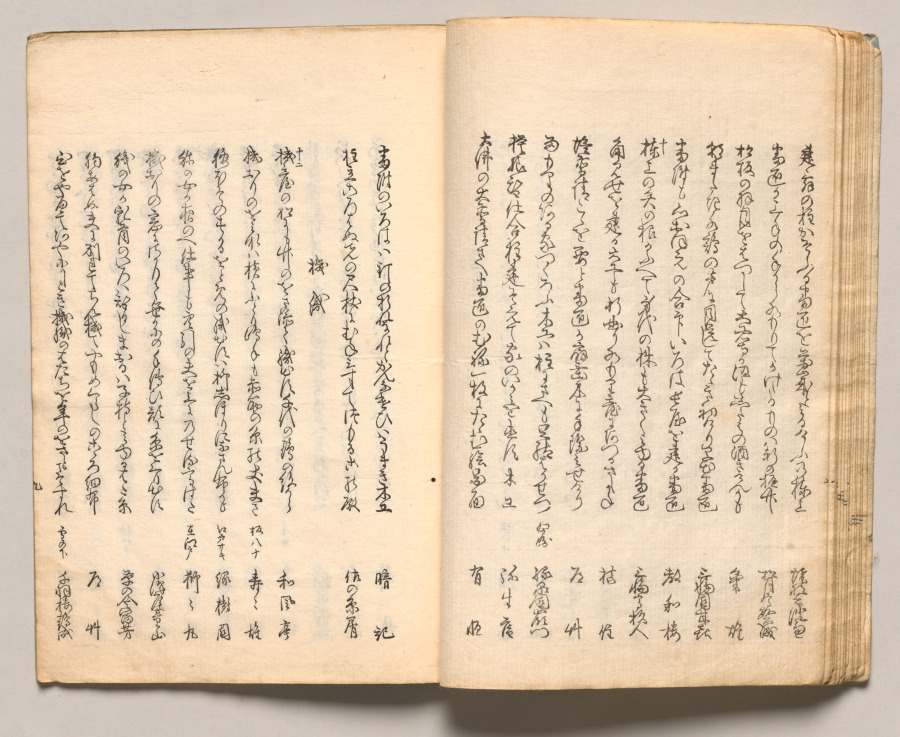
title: Spread Sixteen from Volume Two of People of Japan in Light Verse (Kyōka)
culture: Japan, Edo period (1615–1868)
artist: Utagawa Hiroshige (Japanese, 1797–1858)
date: 1857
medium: Woodblock-printed book; ink and color on paper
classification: Bound Volume